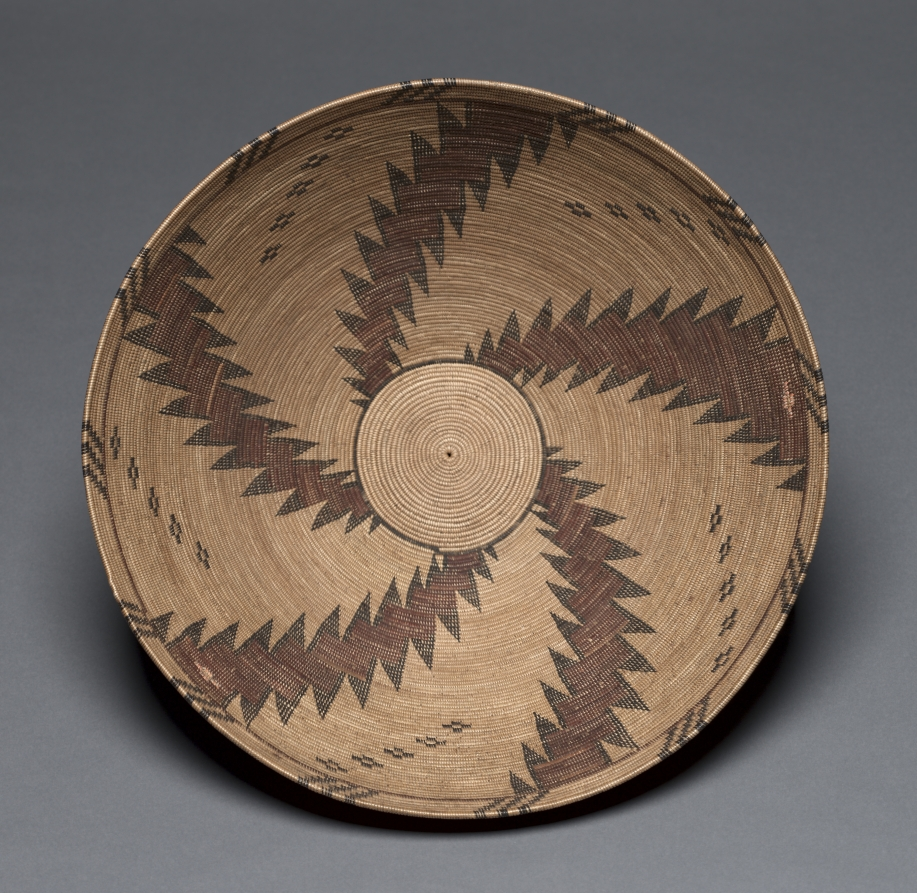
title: Presentation Bowl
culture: Native North America, Great Basin, California, Death Valley, Timbisha (Panamint) Shoshone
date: 1880–90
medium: devil's claw, sumac, yucca root, orange-shafted flicker (woodpecker) quills; coiled (2 rod and bundle of deer grass or basket grass)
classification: Basketry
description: This basket was made for the Euro-American collectors’ market in the early 1900s but it is modeled on basketry bowls from which the Timbisha (Panamint) Shoshone once served food. When used indigenously, the main view would have been of the interior. The two small, pink crosses, made of flicker (woodpecker) quills, may be a maker’s mark. Made-for-sale baskets testify to Indigenous women’s truly creative, resilient responses to forces that endangered their livelihoods and existence.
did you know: The two small, pink crosses on this basket may be a maker’s mark.